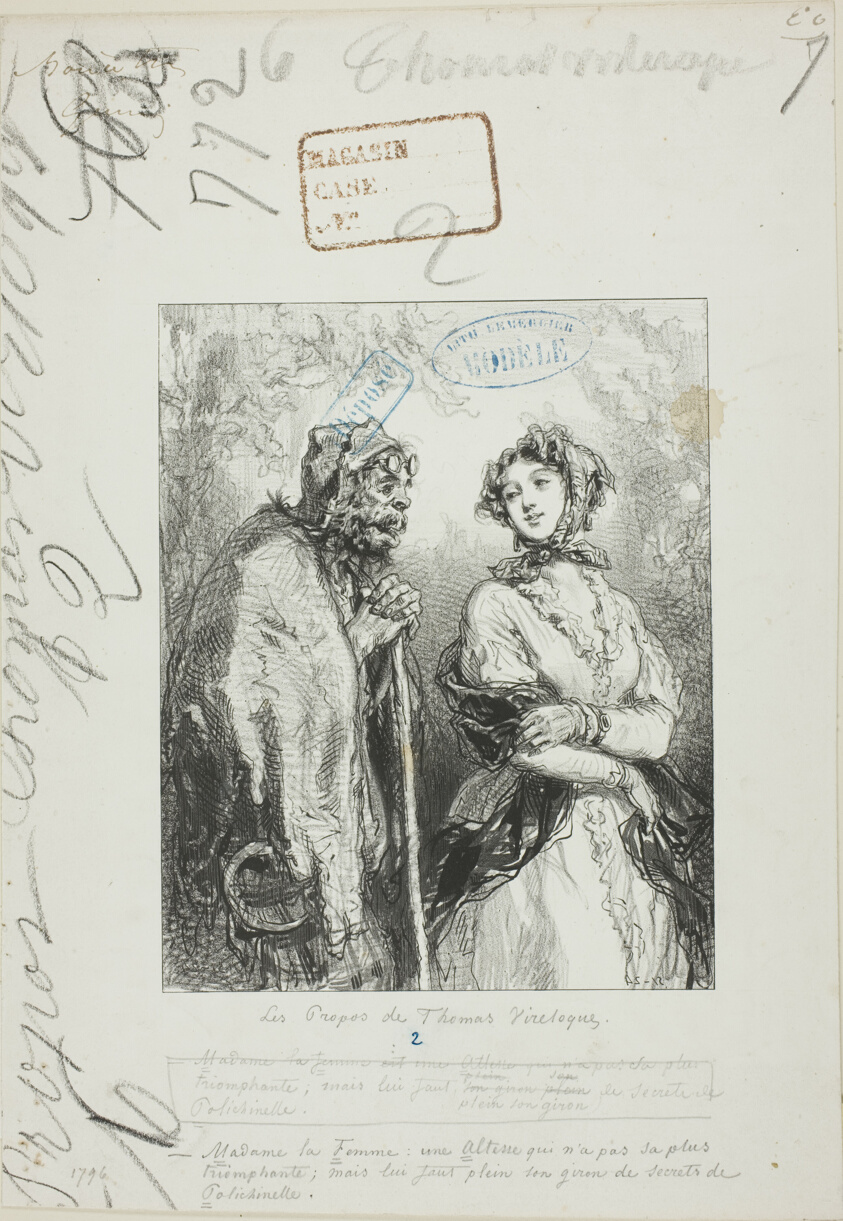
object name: Print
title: Les-Parents-Terribles series: Mrs. Woman is a Majesty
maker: Paul Gavarni (French, 1804-1866)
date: 1852–53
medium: Lithograph in black on ivory wove paper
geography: France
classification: lithograph; print; prints and drawing